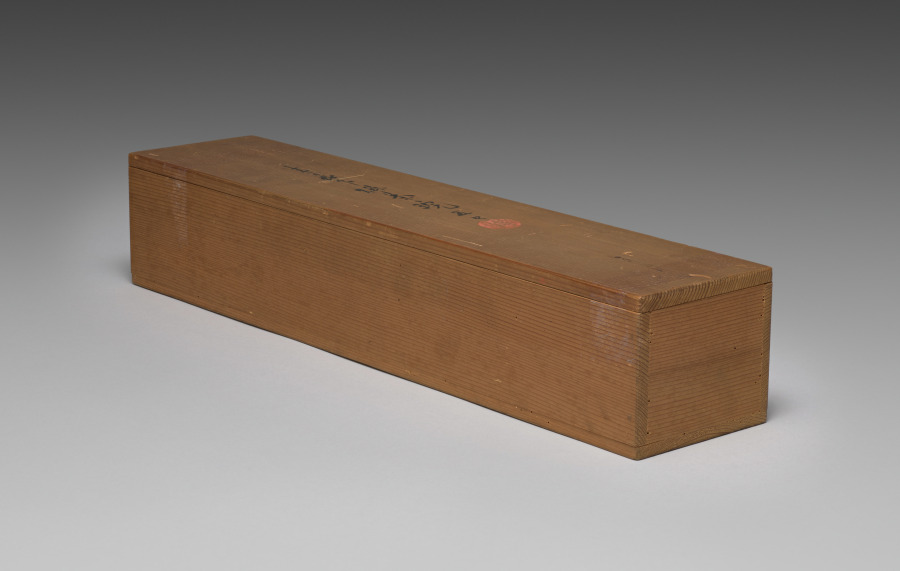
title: Tea Set with Orchids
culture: Japan, Meiji period (1868–1912)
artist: Seifū Yohei III (Japanese, 1851–1914)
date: c. 1893–1914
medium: Teapot with set of five teacups; porcelain with underglaze blue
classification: Ceramic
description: Although the teapot here is stored in a separate box from the five cups, these six pieces may once have been part of a tea set that included other tools such as a water cooler. The teacups have orchid flowers on both sides in underglaze blue, as well as a blue band inside the footring. The teapot has the same design and a blue band painted around the bottom of the lid’s knob. The cups’ long wood storage box is stamped on the exterior, over the lid and base, with a small red seal reading “Satō.” The same seal appears on five small squares of yellow textile, one placed in the bottom of each compartment in the teacup storage box. These are additional to the customary yellow cloths stamped with a “Seifu” seal. Interestingly, four of the Seifū cloths are stamped with an ovoid seal, while the remaining cloth, which is a slightly lighter color, has an unusual seal that is not quite gourd-shaped and with the fū of Seifū in a stylized, unrecognizable form. The teapot has its own box with a Satō seal and is wrapped with an orange textile stamped with the same unusual Seifū seal. A set with a very similar surface design is in the Brooklyn Museum. The Brooklyn set has a water cooler and a small pitcher, in addition to the teapot and cups, and all are in a single storage box. This box records the tea tools as made with kanpakuji, or “bright-jewel white porcelain,” counted among Yohei III’s most important inventions, and carved images. In fact, both sets have a white surface much closer in coloration to the cool white of porcelain clay used in Kyoto at the time, and the designs are simply painted. The Brooklyn set was thus likely mismatched at some point with a box intended for another tea set. Nonetheless, the box may have helped prevent the set’s original components from being dispersed, and the set itself provides insight into how the other tools from the present set may have looked.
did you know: This tea set with orchids has a side-handled pot called a kyūsu, used for steeping, straining, and serving tea.